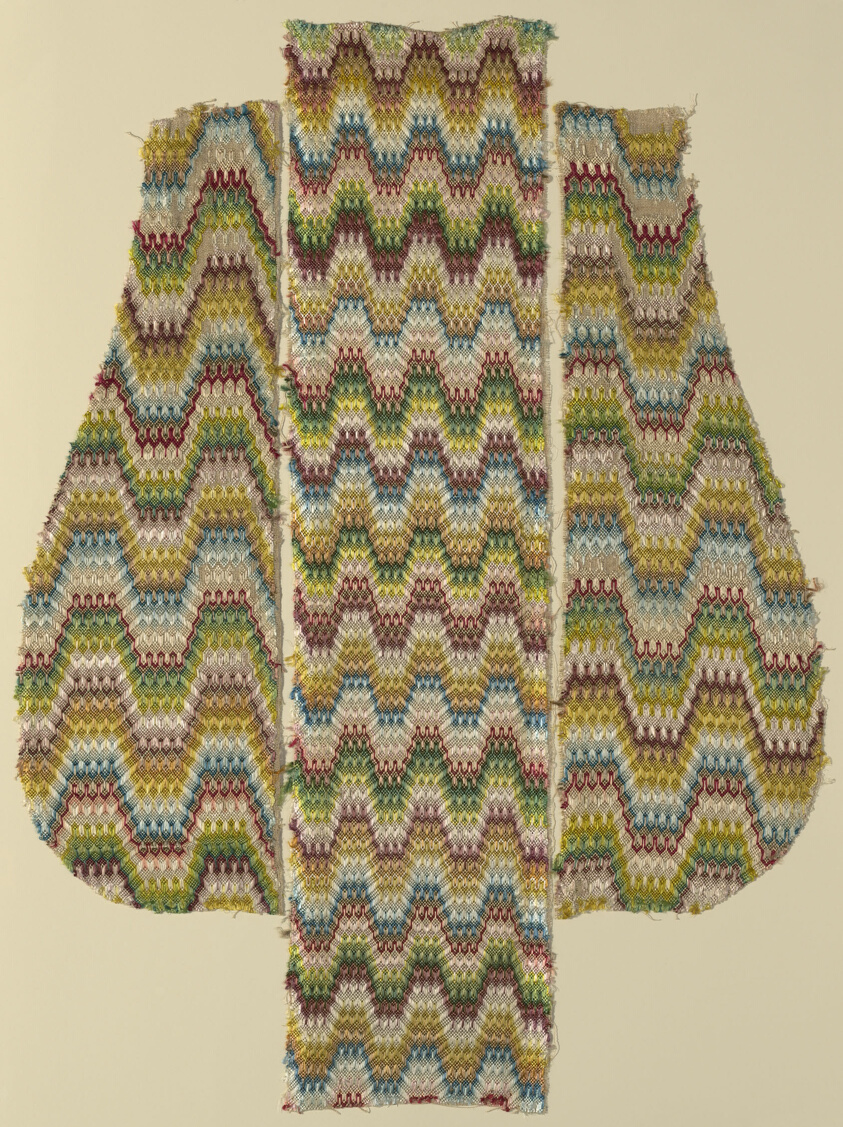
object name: Textile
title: Three Fragments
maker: Italy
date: 17th century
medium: Linen, plain weave; embroidered in silk in thread counted needlework (Irish stitch)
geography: Italy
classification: textile; weaving; needlework (visual works)